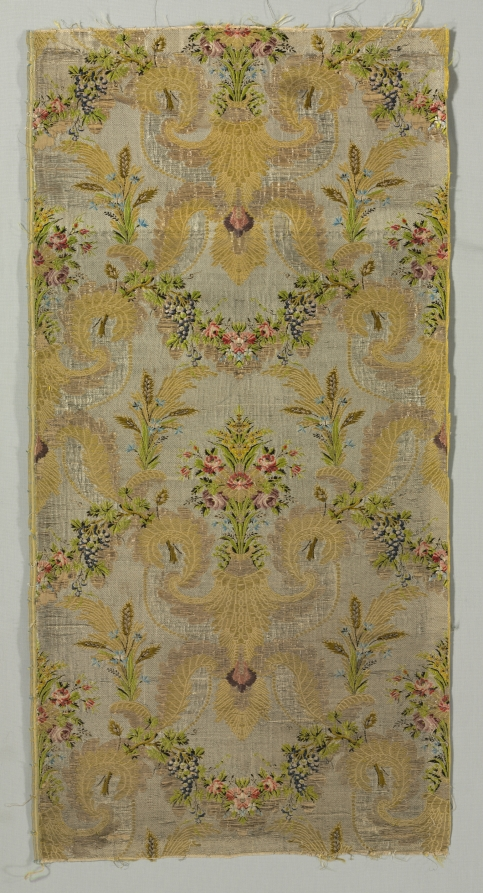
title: Silk Cloth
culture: Spain, early 18th century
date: early 18th century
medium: plain cloth, brocaded; silk and metal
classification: Textile